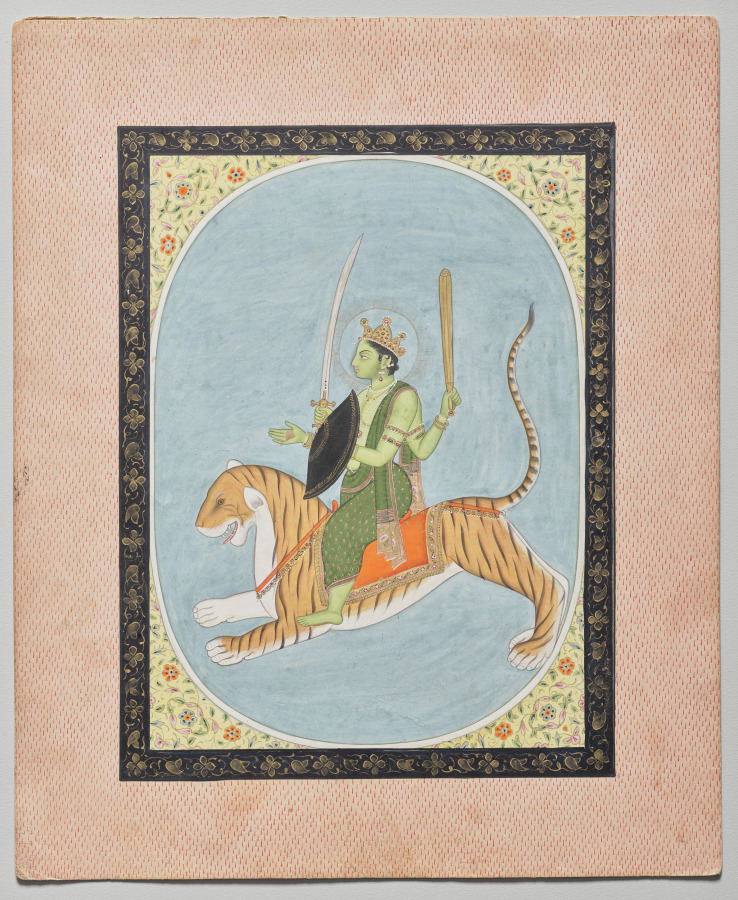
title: Mars, from a Mandi Astrology Series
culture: Northern India, Pahari kingdoms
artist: attributed to Sanju (Indian, active late 1700s–early 1800s)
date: c. 1810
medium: Gum tempera and gold on paper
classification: Painting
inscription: On the verso is the number four, in devanagari notation, written on the top and bottom edges.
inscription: The purple stamp of the kingdom of Mandi’s royal library bears the handwritten number 1268. Above is the number 22.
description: This page is from a series of paintings featuring astrological subjects, including personifications of planets and signs of the zodiac. Historically in India, the auspicious conjunction of planets with certain calendar dates was important for determining when to schedule events or ceremonies. Mars is depicted as a warrior with green skin and riding a tiger through the sky.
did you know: The god Mars in Roman mythology is also a warrior.